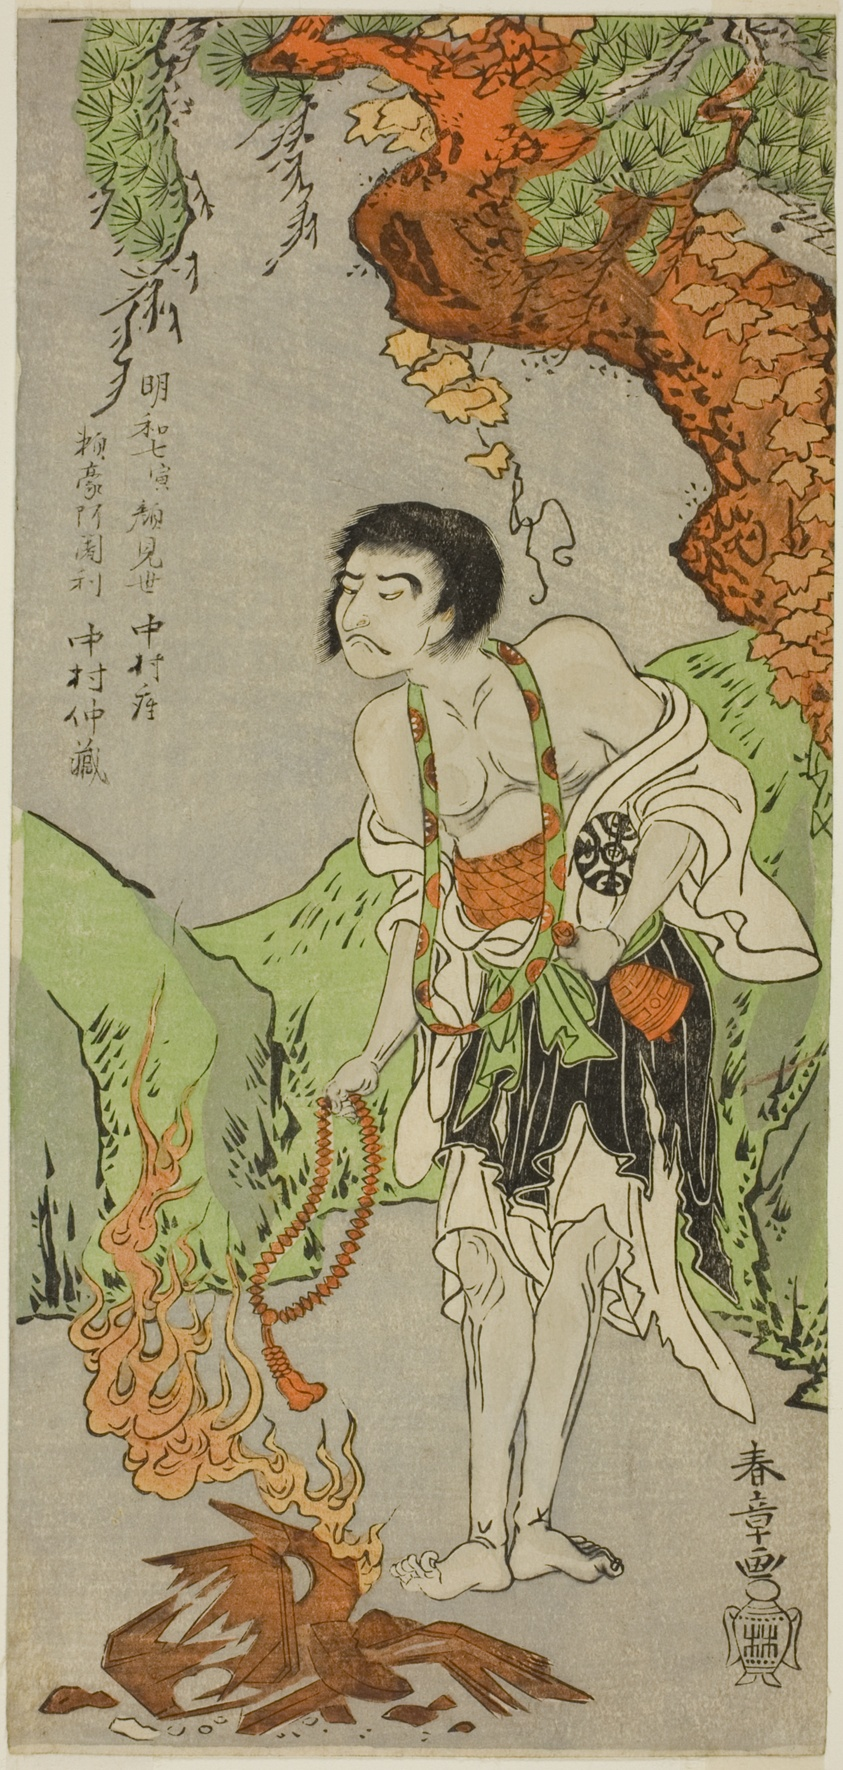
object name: Print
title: The Actor Nakamura Nakazo I as a Monk, Raigo Ajari, in the Play Nue no Mori Ichiyo no Mato (Forest of the Nue Monster: Target of the Eleventh Month), Performed at the Nakamura Theater from the First Day of the Eleventh Month, 1770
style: Japanese (culture or style)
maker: Katsukawa Shunsho 勝川 春章; Japanese, 1726-1792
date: c. 1770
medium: Color woodblock print; hosoban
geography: Japan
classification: woodblock print; print; asian art